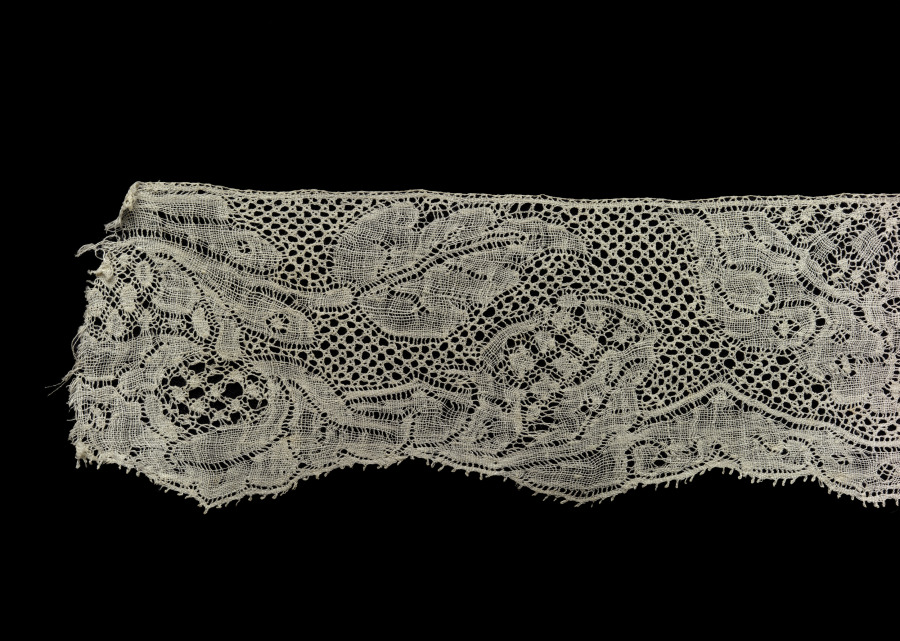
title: Lace Edging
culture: Belgium, Binche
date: 1740–60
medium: Bobbin lace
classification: Lace